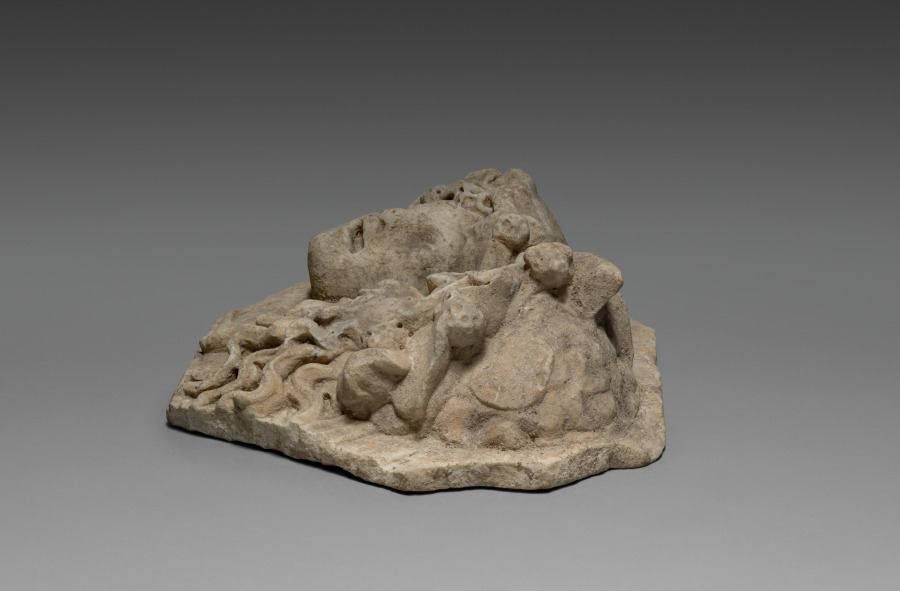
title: Two Masks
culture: Italy, Roman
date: 200s CE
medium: marble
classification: Sculpture